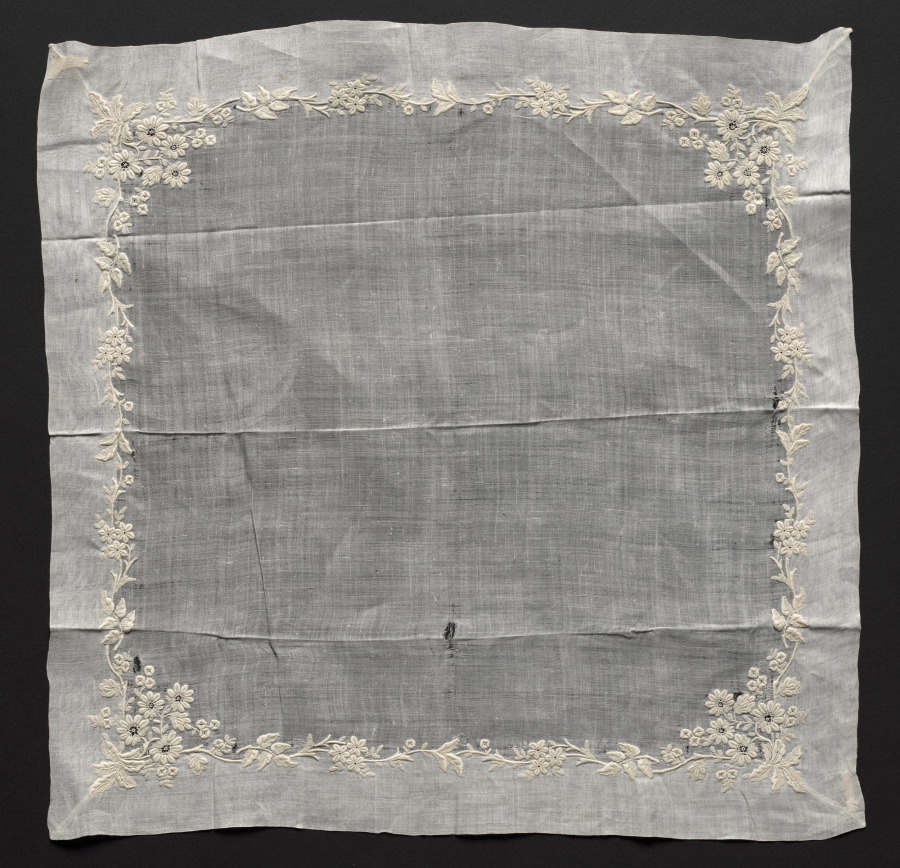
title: Embroidered Handkerchief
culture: Switzerland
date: 1880–99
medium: Plain weave linen: embroidered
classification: Embroidery